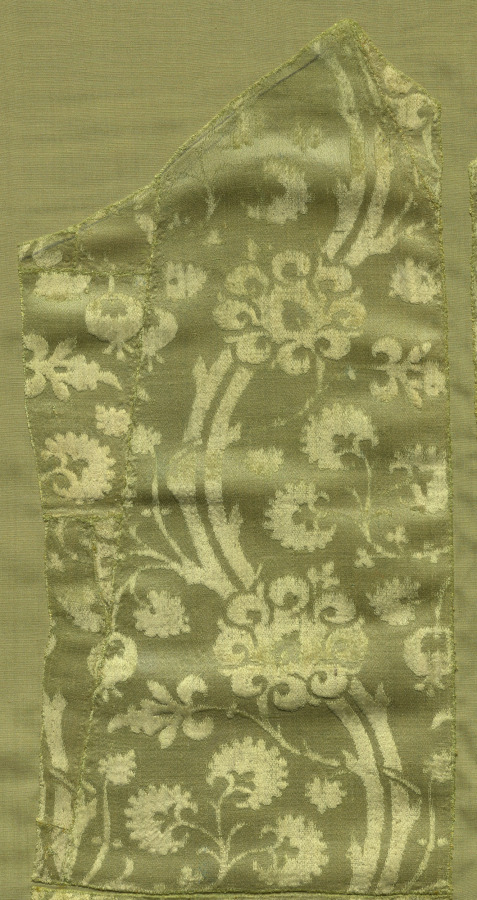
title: Fragment of a Chasuble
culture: Italy, beginning of the 15th century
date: 1400–1420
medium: velvet (cut and voided); silk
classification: Velvet